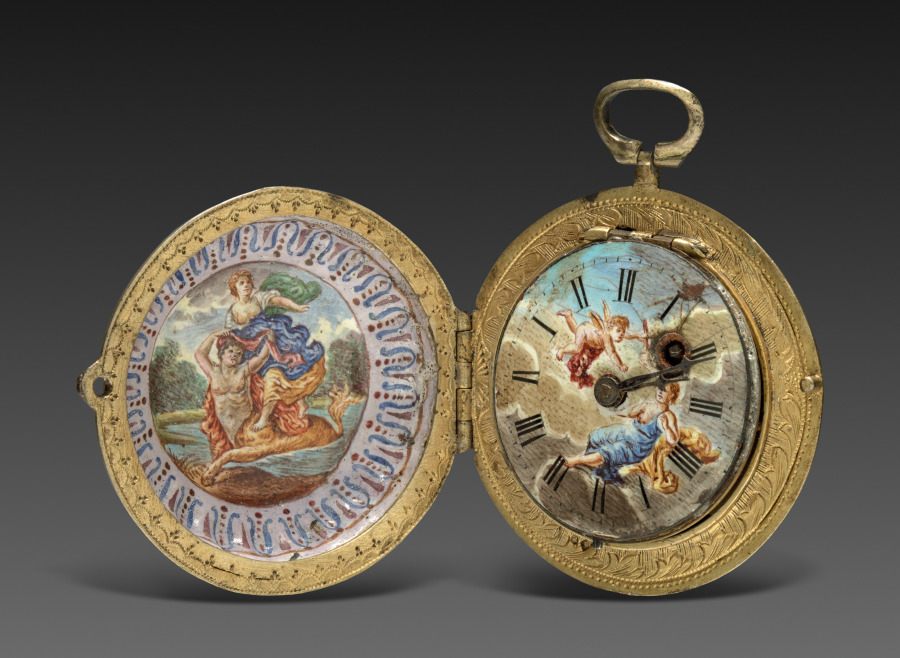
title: Watch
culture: France, Paris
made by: Marchand (French)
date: late 1700s - early 1800s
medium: enameled case mounted in engraved gilded metal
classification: Jewelry